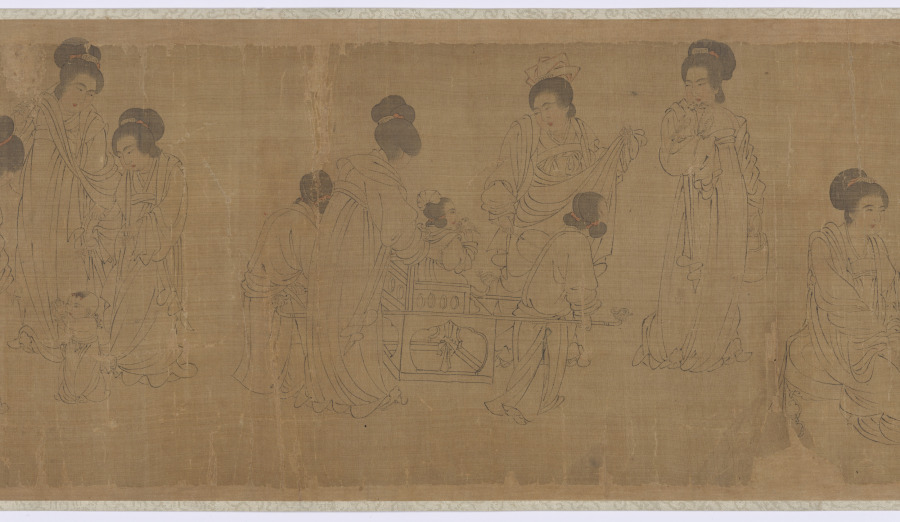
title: In the Palace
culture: China, Southern Song dynasty (1127-1279)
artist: after a work attributed to Zhou Wenju (Chinese, active 942–961)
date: before 1140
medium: Handscroll; ink and light color on silk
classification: Painting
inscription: 1 colophon and 13 seals: 1 colophon and 1 seal of Zheng Cheng 張澂 (d. 1143); 12 seals unidentified.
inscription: Colophon by Zhang Cheng 張澂 (d. 1143): 周文矩宮中圖婦人小兒其數八十，一男子寫神，而粧具、樂器、盆盂、扇椅席、鸚鵡、犬蝶不與。文矩句容人，為江南翰林待詔。作士女體近周昉，而加纖麗。嘗為後主畫南莊圖，號一時絕筆。它日上之朝廷，詔籍之祕閣。宮中圖云是真蹟，藏前太府卿朱載家。或摹以見餽。婦人高髻自唐以來如此。此卷豐肌長襦裙，周昉法也。予至嶠南，於端溪陳高祖之裔，見其世藏諸帝像，左右宮人梳髻與此畧同。而丫鬟乃作兩大鬟，垂 肩項間，雖醜而有真態。李氏自謂南唐，故衣冠多用唐制，然風流寔承六朝之餘。畫家者言辨古畫當先問衣冠車服，蓋謂是也。紹興庚申五月乙酉澹嵒居士題。 印：張澂印章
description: In the Palace depicts 13 ladies of the imperial household, three servants, and six children in fluent baimiao (plain drawing) brushwork, accentuated by color. The women entertain themselves by making music, tending children, and playing with pets. Their elaborate hairstyles, plump figures, and flowing robes are reminiscent of Tang dynasty fashion. The scroll illustrates elegant court life and is a direct copy of the original by Zhou Wenju (active 940–75) from Zhenjiang, Jiangsu province. Zhou was employed at the Southern Tang court in Nanjing under Emperor Li Yu (reigned 961–76), a prolific poet.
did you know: The ladies' elaborate hairstyles, plump figures, and flowing robes are reminiscent of Tang dynasty fashion.